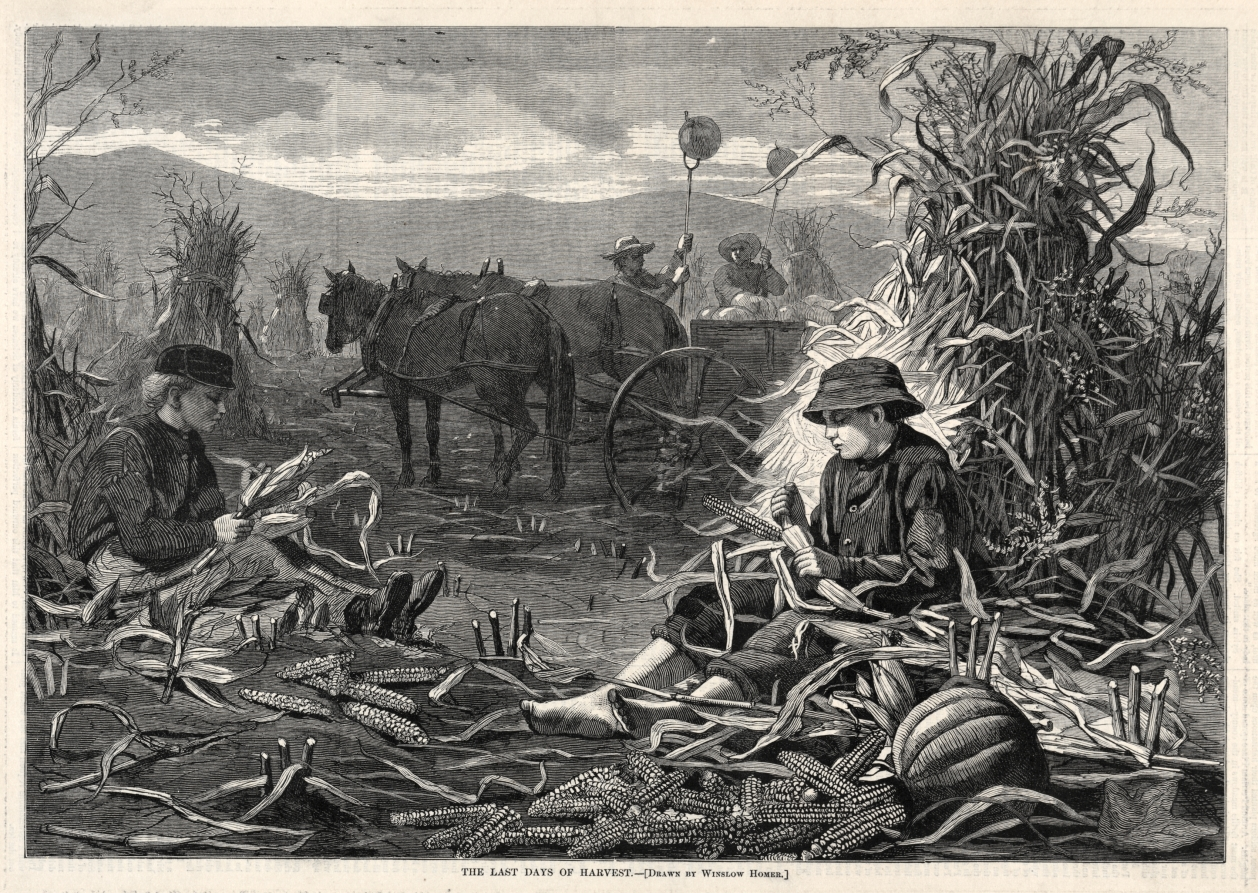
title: The Last Days of Harvest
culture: America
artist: Winslow Homer (American, 1836–1910)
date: 1873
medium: wood engraving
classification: Print